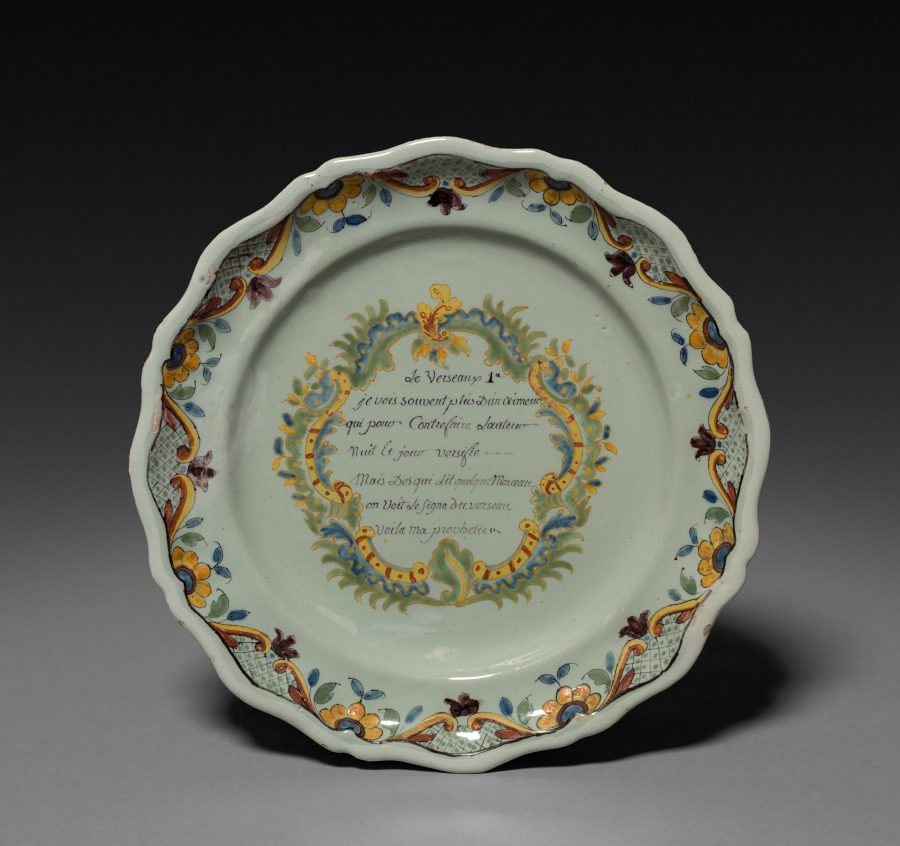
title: Plate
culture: France, Montauban(?), 18th century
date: c. 1780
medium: faience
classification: Ceramic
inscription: inscribed with French poem in center.